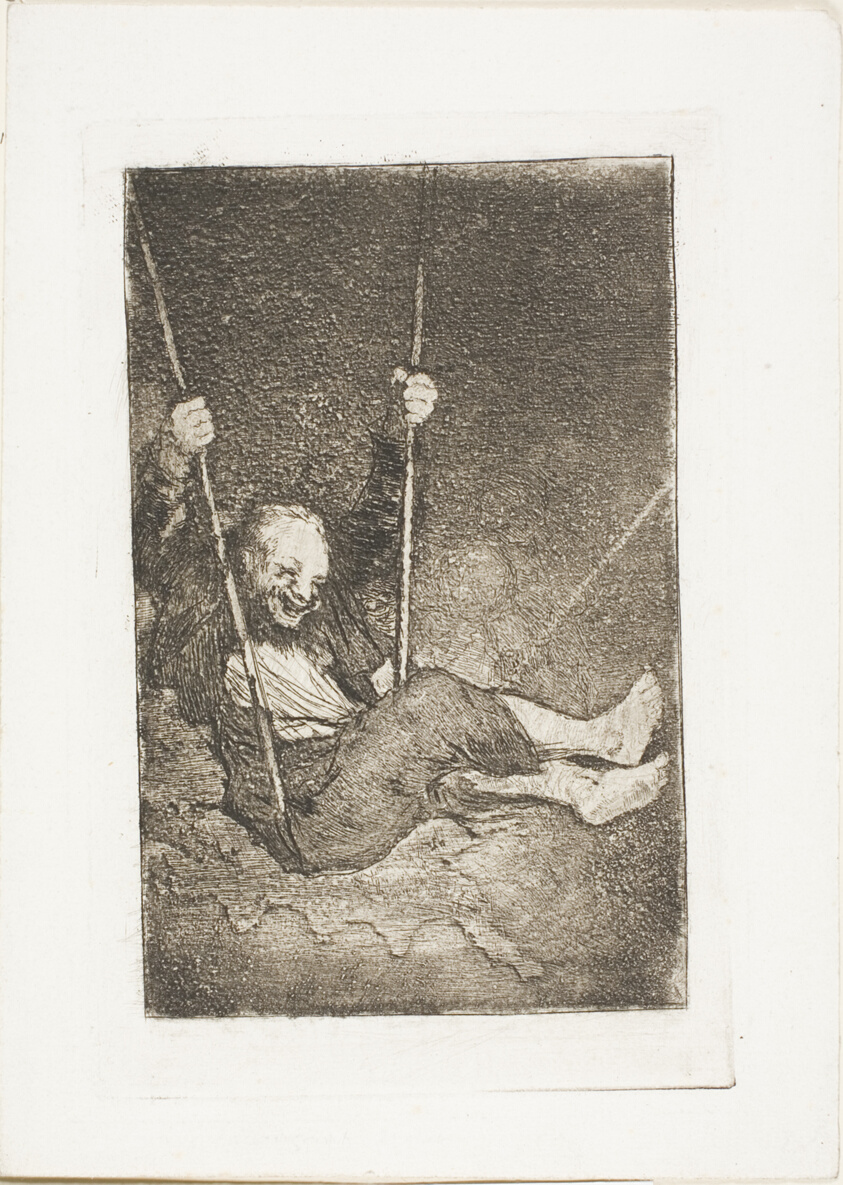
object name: Print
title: Old man on a swing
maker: Francisco José de Goya y Lucientes (Spanish, 1746-1828)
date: 1825/27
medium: Etching and burnished aquatint and/or lavis on ivory paper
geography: Spain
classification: etching; print; prints and drawing